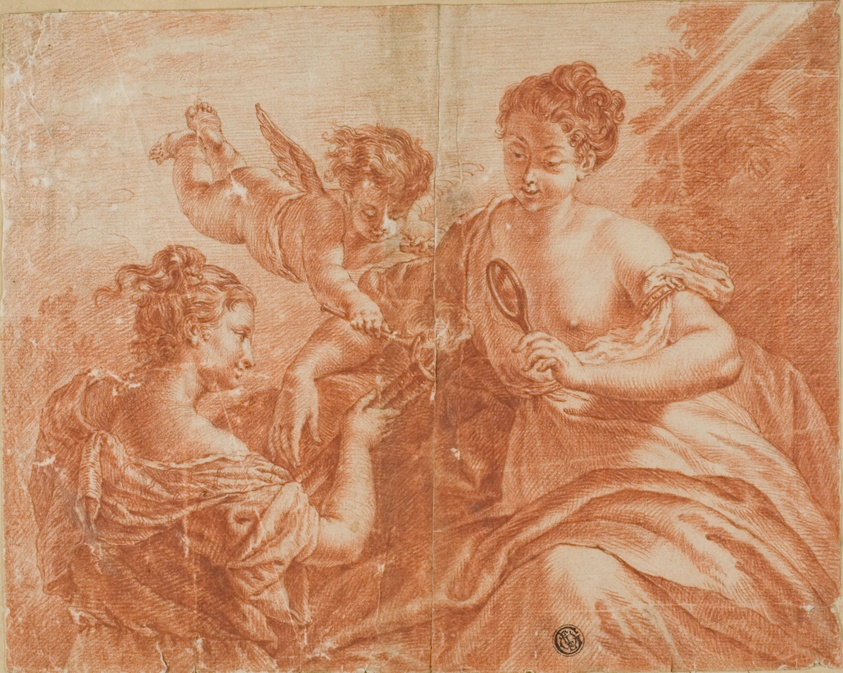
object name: Drawing and Watercolor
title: Cupid and Two Women Lighting a Torch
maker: Unknown Artist; German, 1700-1799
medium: Red chalk, on ivory laid paper, tipped on tan wove paper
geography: Germany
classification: chalk; drawings (visual works); prints and drawing